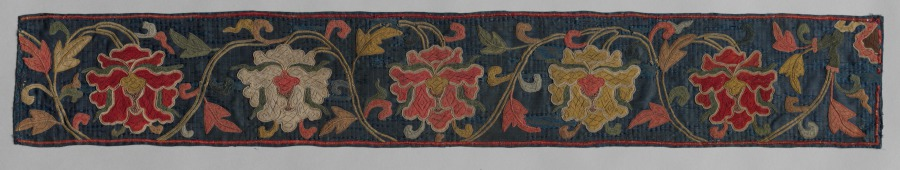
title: Embroidered Border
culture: China, 14th century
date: 1300s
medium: needle-looped embroidery, silk, gold thread, silver paper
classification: Embroidery